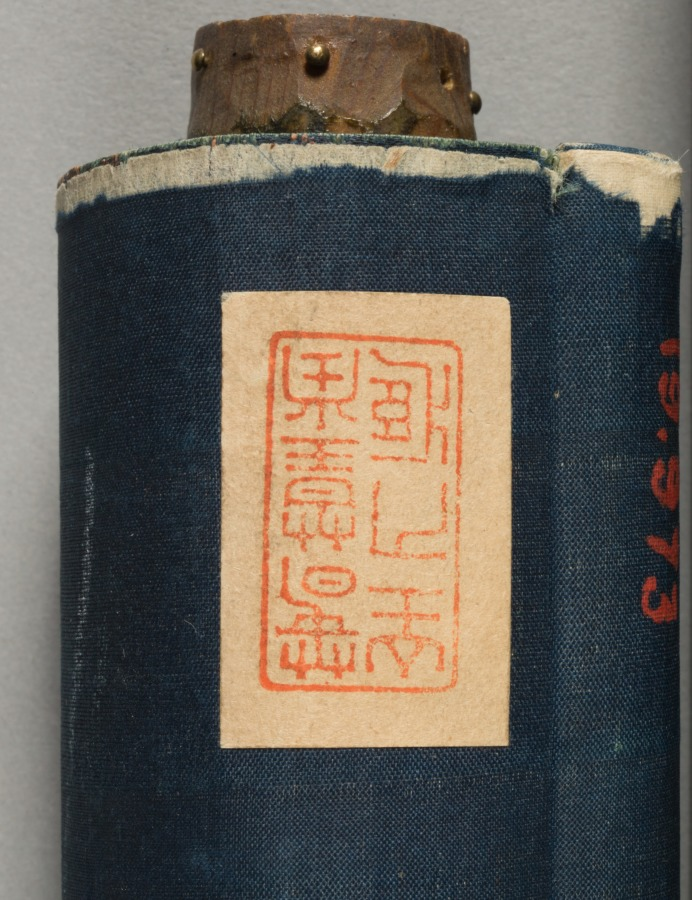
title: Monju as a Child (Chigo Monju)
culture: Japan, Muromachi period (1392–1573)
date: early 1400s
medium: hanging scroll; ink, color, and gold on silk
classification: Painting